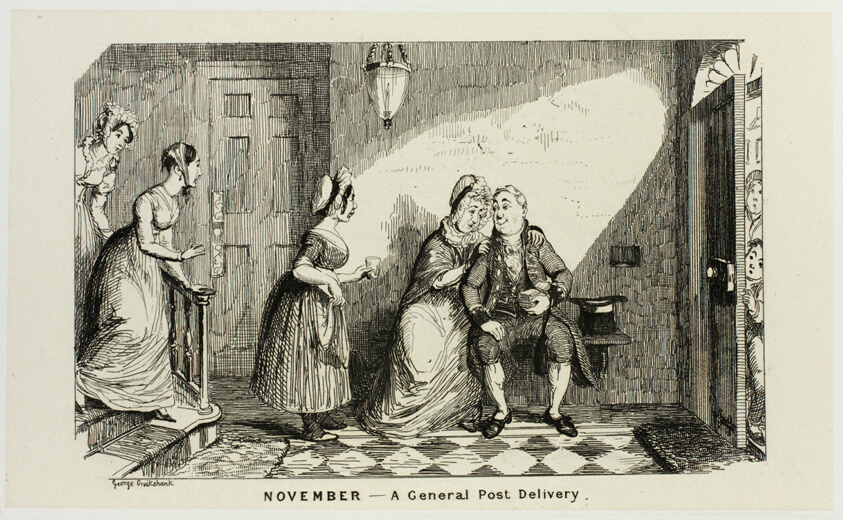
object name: Print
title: November - A General Post Delivery in Opposition from George Cruikshank's Steel Etchings to The Comic Almanacks: 1835-1853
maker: George Cruikshank (English, 1792-1878); published by Pickering & Chatto (English, 19th century)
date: 1839, printed c. 1880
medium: Steel etching in black on cream India paper, laid down on off-white card (chine collé)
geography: England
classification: etching; paper; steel; print; prints and drawing